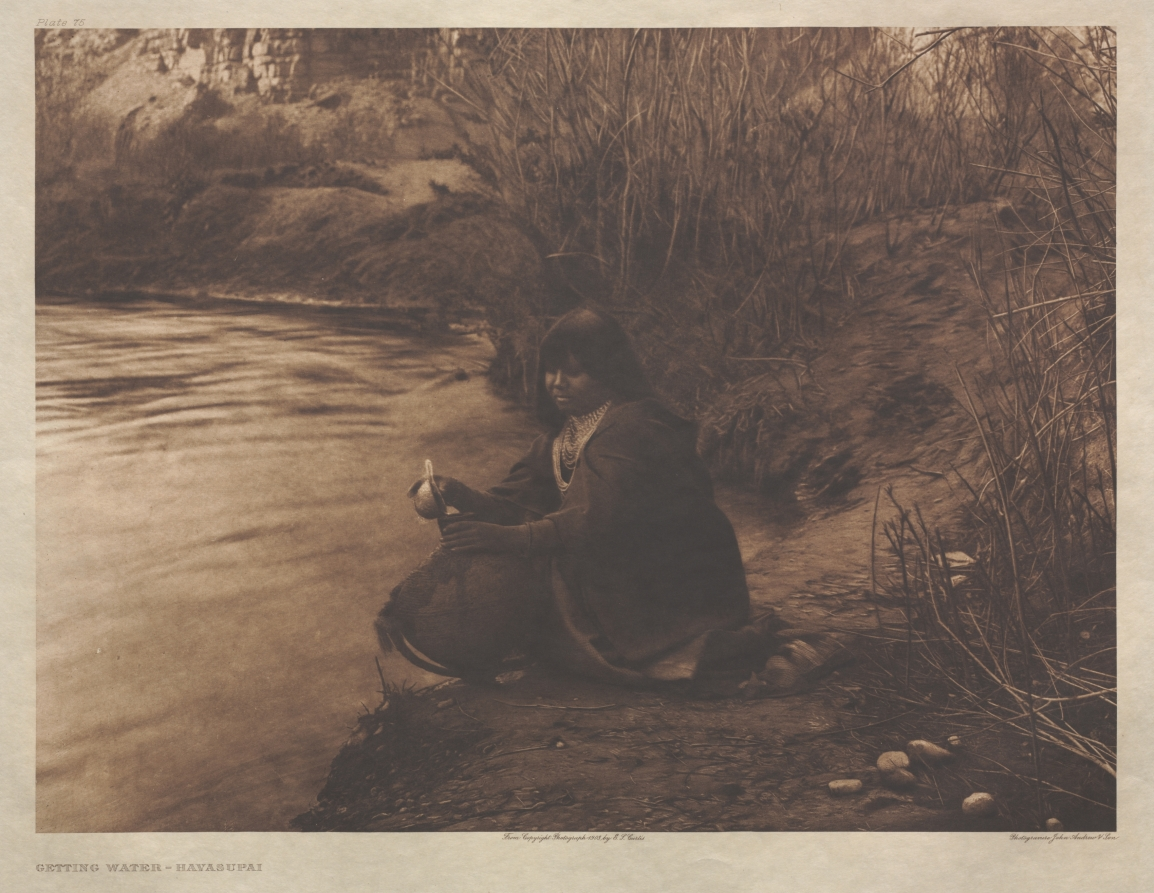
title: Portfolio II, Plate 75: Getting Water-Havasupai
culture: America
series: The North American Indian: being a series of Portfolios picturing and describing the Indians of the United States, the Dominion of Canada, and Alaska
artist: Edward S. Curtis (American, 1868–1952)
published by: The University Press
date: 1903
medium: photogravure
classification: Portfolio